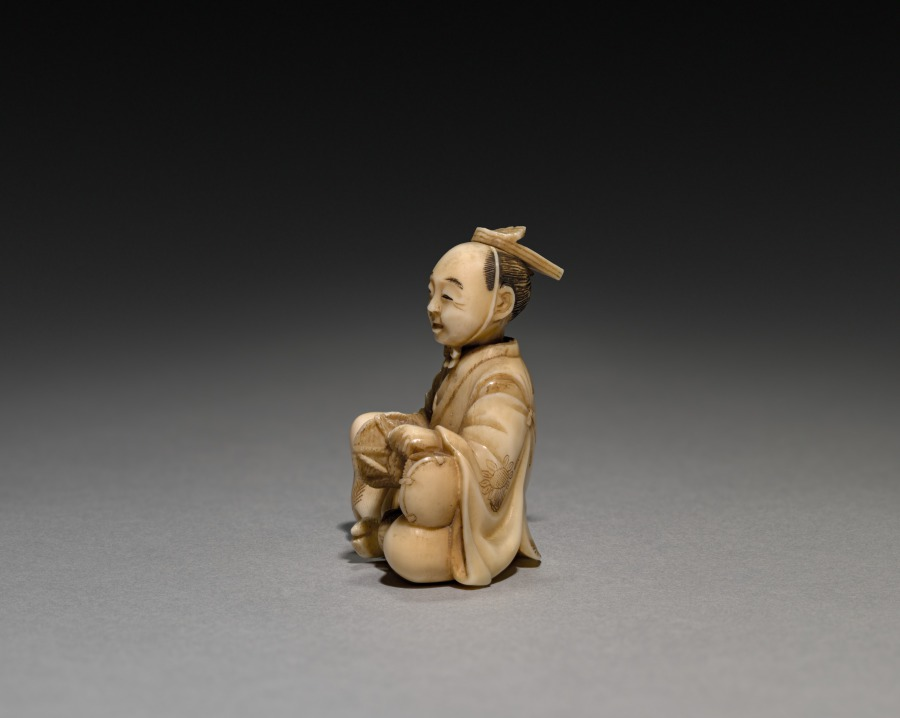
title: Man with a Drum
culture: Japan, Meiji period (1868–1912)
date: early 1900s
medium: ivory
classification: Netsuke